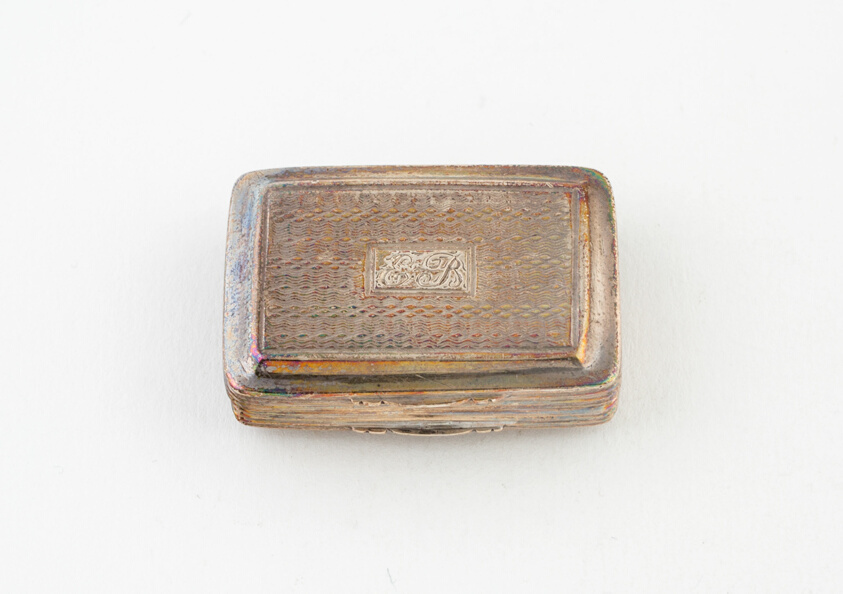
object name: Metalwork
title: Vinaigrette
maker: John Bettridge (Birmingham, England)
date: c. 1822/23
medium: Silver and silver gilt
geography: Birmingham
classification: container for personal use; vinaigrette (container for health care); european decorative arts; metalwork; silver; decorative object/ornament